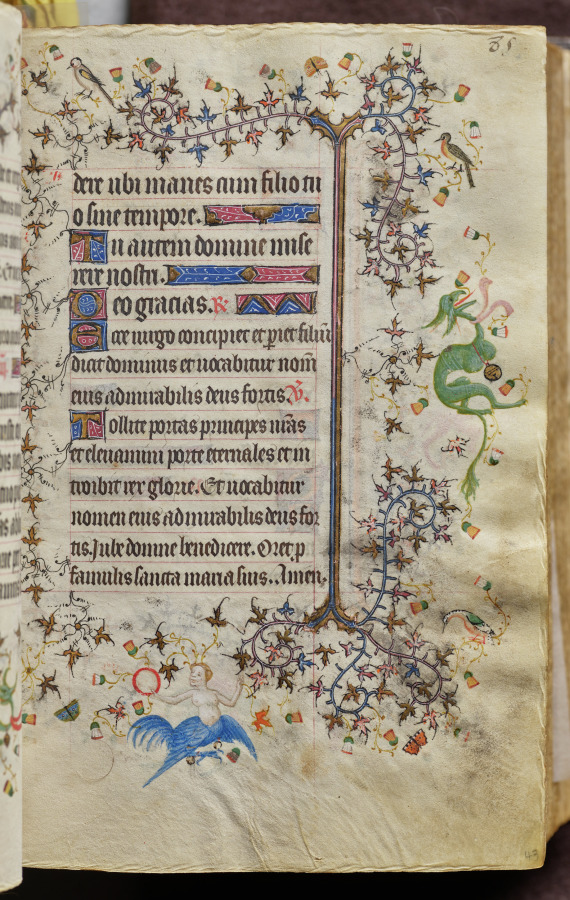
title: Hours of Charles the Noble, King of Navarre (1361-1425): fol. 43r, Text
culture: France, Paris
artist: Master of the Brussels Initials and Associates (French)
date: c. 1405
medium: ink, tempera, and gold on vellum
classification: Bound Volume